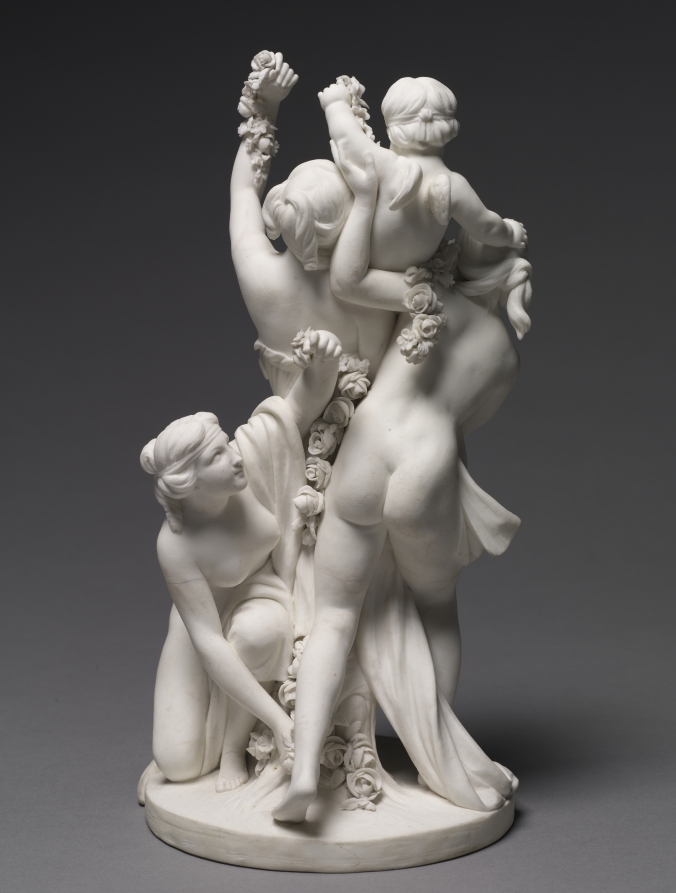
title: Figure Group of Love Carried by the Three Graces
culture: France, Sèvres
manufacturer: Sèvres Porcelain Factory (French, est. 1756)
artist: after a design by François Boucher (French, 1703–1770)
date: c. 1768–78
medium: unglazed soft-paste porcelain (biscuit)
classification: Ceramic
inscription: [Incised on top of base]: "B"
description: This figure group was likely modeled after the designs of François Boucher, whose designs appeared as figures or paintings on Sèvres porcelain. The scene represented is pulled from classical antiquity; the child wreathed in flowers is a physical manifestation of love and the women who hold him aloft are the three daughters of Zeus, Greek god of the sky.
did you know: The design of this figure group appeared among the 38 porcelain figure groups included in a service commissioned for Catherine of Russia in 1779.